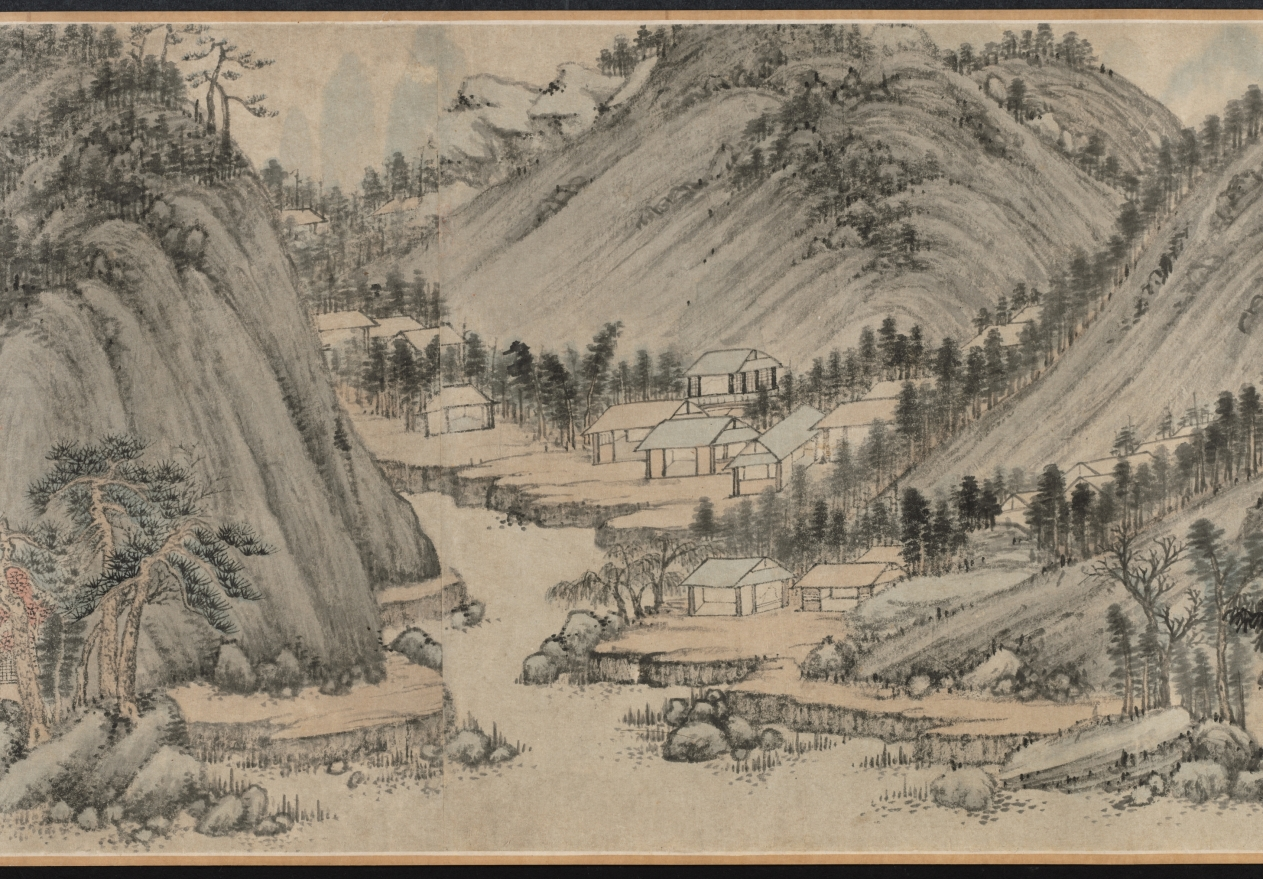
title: Mt. Taibo in the Style of Wang Meng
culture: China, Ming dynasty (1368–1644)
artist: Du Qiong (Chinese, 1396–1474)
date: 1442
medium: handscroll; ink and light color on paper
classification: Painting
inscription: Artist's inscription, signature, and 11 seals: [1 seal] Tung-yüan chai. Huang-ho-shan-ch'iao [Wang Meng] painted a painted called T'ai-po Mountain. Its brushwork is superior and admirable, which is very close to Yu-ch'en [Wang Wei, 699-759]. The cleverness of its composition, the maple groves and rustic temples, the inaccessible ravines and autumnal plateaus, the periolous peaks and strange rocks, etc., all seem to be so natural. The paper is only a little over eight feet, but the landscape has the range of a thousand miles. Once you open and note the contents, it is as if one were roaming among the mountain peaks enveloped in mist and clouds, and forgot the dusty world. When I first saw this, I was so mixed with excitement and joy that I could not take my hands off the painting. So I put it on the table, and tried my best to imitate it, forgetting sleeping and eating for about three months before it was completed. Although I do not dare to tread in the footsteps of Huang-ho shan ch'iao, I took great pains to capture his spirit in composition and colors. I do not know whether it would pass the judgment of the experts. On the fifteenth day of the fifth month, the seventh year of the Cheng-t'ung year [1442], inscribed by Tung-yüan, Tu Chiung. [2 seals] Yung-chia; Ching-chieh ming-men. [8 seals on painting] Tung-yüan chai; Ching-chieh ming-men; Yung-chia; Tu Ch'iung yin; Tung-yüan (repeated 5 times). trans. WKH/LYSL 3 colophons and 7 additional seals: 1 colophon and 2 seals of Chou Ting (1401-1487); 1 colophon and 2 seals of Wu K'uan (1435-1504); 1 colophon, dated 1655, and 2 seals of Lan Ying (1585-after 1664).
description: When a Chinese painter "imitated" a painting by a past master, the intention was never to produce an exact copy. Du Qiong, the Ming painter from Suzhou, is a case in point. The painting style of this handscroll is actually closer to that of Huang Gongwang (1269–1354) than to the style of Wang Meng (about 1301–1385). Both masters were active during the previous dynasty and are among the so-called Four Great Masters of the Yuan dynasty (1279–1368). In this painting, the interplay of styles, including Du Qiong's own, contribute to an inner dimension that is more than visual. Mt. Taibo is located in the province of Zhejiang and is known for its scenic beauty. In this scroll, however, it is not depicted literally. The image is an ideal representation of mountains in southeastern China.